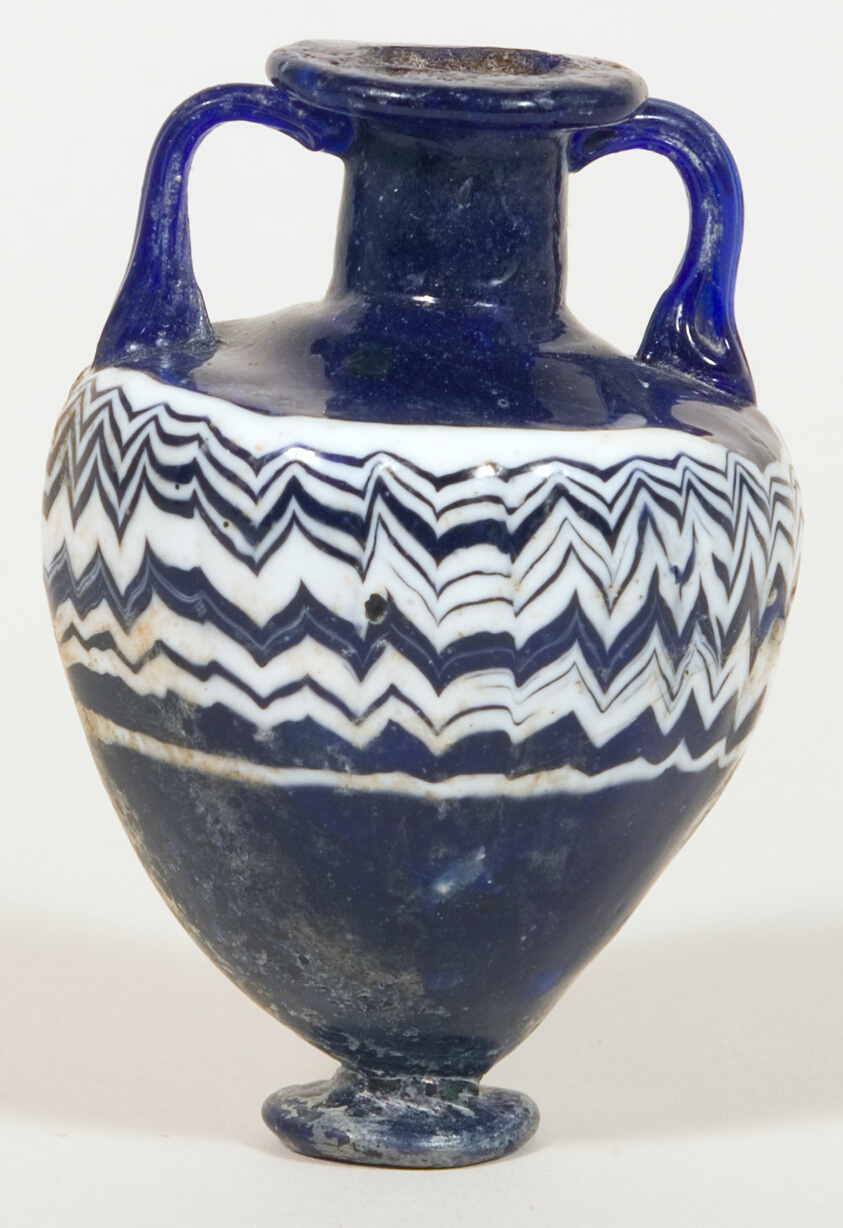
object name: Vessel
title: Amphoriskos (Container for Oil)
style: late period (egyptian)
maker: Eastern Mediterranean or Italian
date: mid–4th-early 3rd century BCE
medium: Glass, core-formed technique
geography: Eastern Mediterranean Region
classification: container; amphoriskos; glass; vessel; ancient art